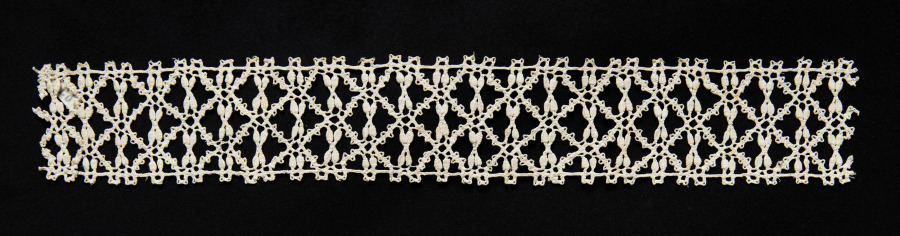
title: Lace Insertion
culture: Italy, Genoa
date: 1550–99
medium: Bobbin lace (needle lace, reticella design)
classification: Lace